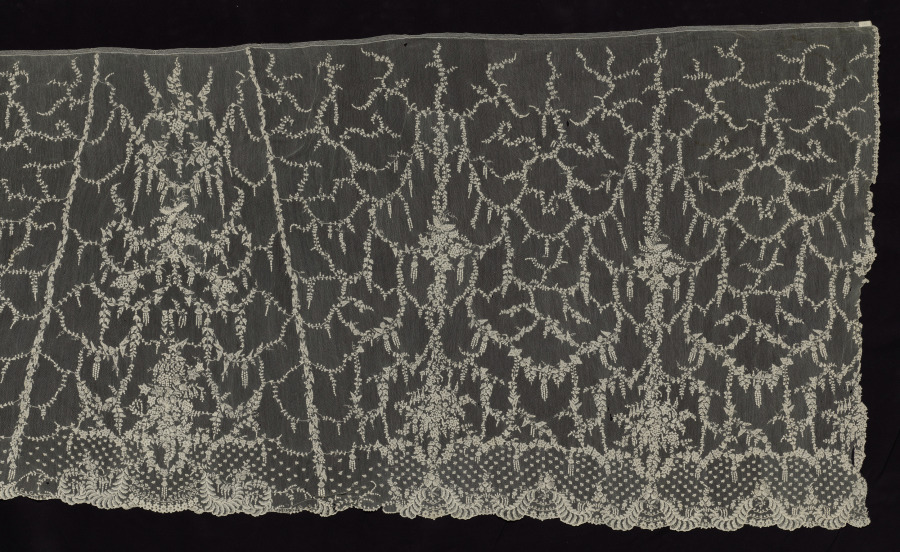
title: Lace Flounce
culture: France, Alençon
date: 1840–60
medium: Needle lace (Point d'Alençon)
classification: Lace